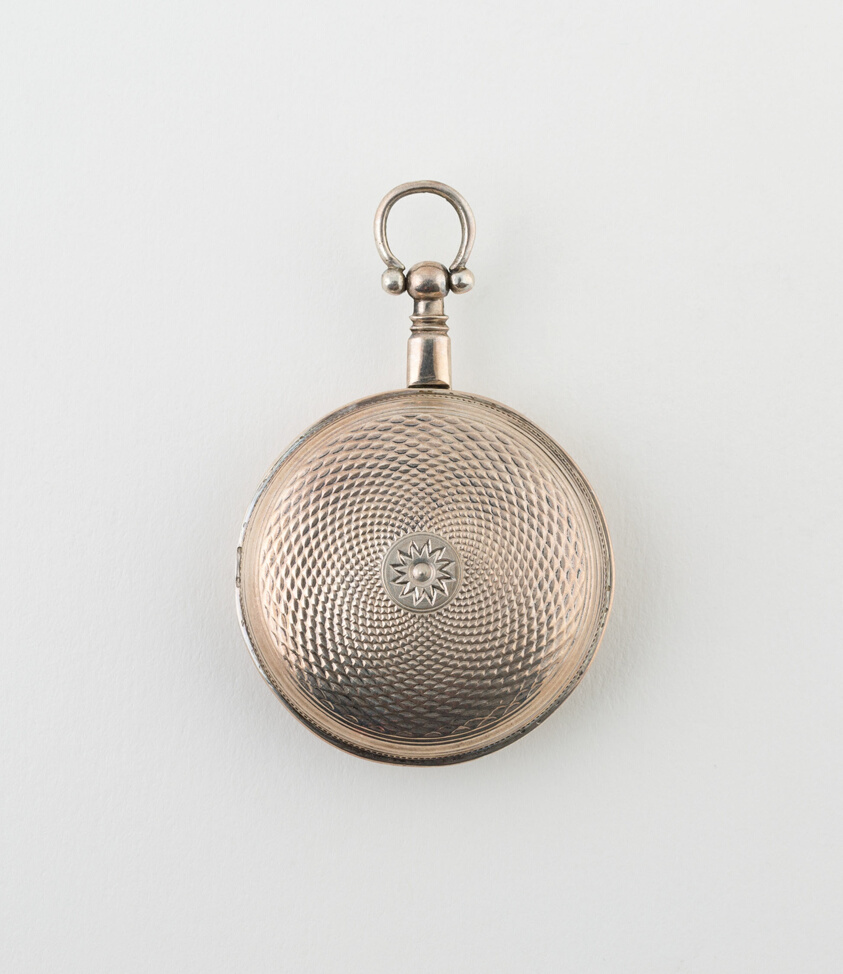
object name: Metalwork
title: Watch-Shaped Vinaigrette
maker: Joseph Willmore; Birmingham, England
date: 1816/17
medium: Silver and silver gilt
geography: Birmingham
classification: container for personal use; vinaigrette (container for health care); european decorative arts; metalwork; silver; decorative object/ornament